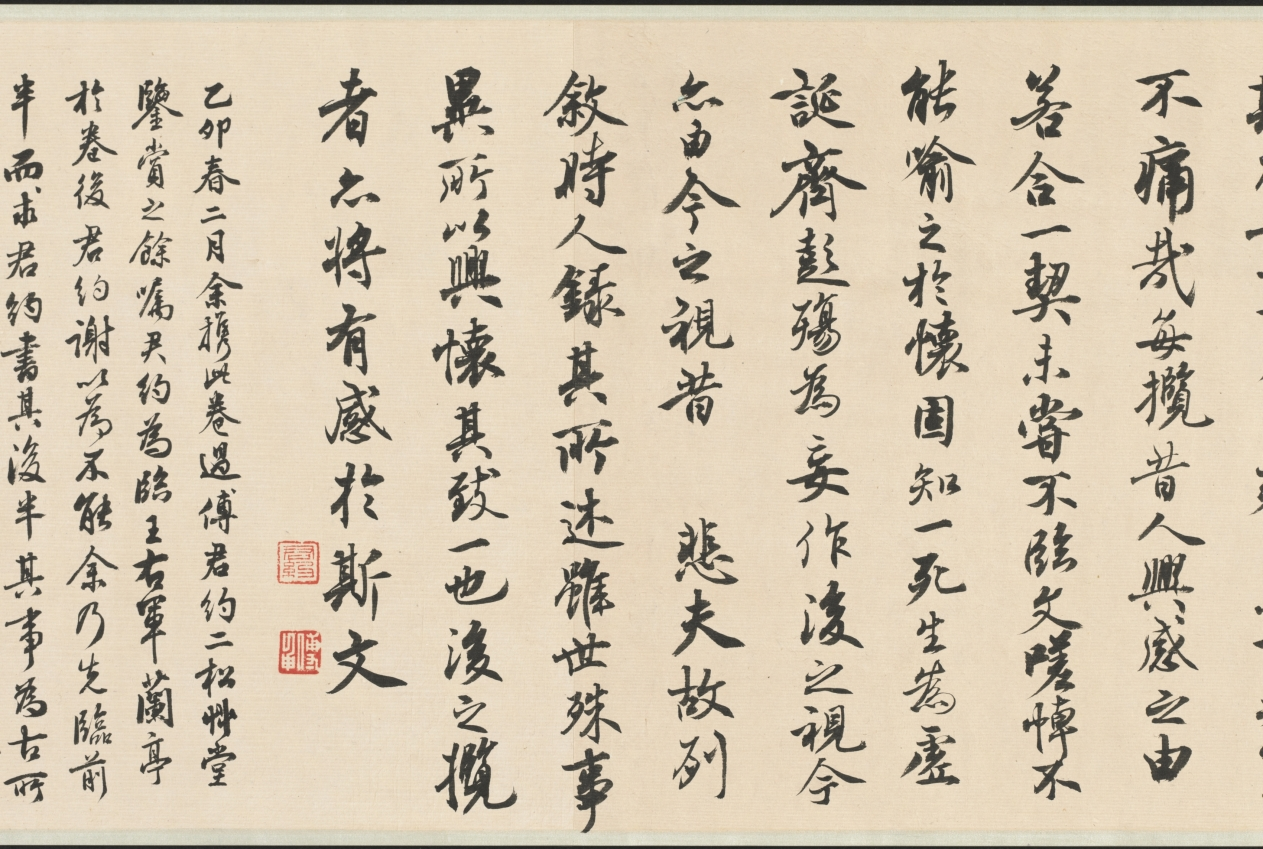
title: Purification at the Orchid Pavilion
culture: China, Qing dynasty (1644-1911)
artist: Fan Yi (Chinese, c. 1615–before 1688)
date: 1671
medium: Handscroll; ink and color on silk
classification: Painting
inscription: Artist's inscription, signature, and 2 seals: Painted by Fan Yi of Zhongfu during the second month of winter of the xinhai year [1671]. [2 seals] Fan Yi zhi yin, Zi yu yi.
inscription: Title on the frontispiece by Monk Yueshan (1629-1709).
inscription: 3 colophons and 13 additional seals: 1 colophon, dated 1707, and 6 seals of Yueshan; 2 colophons and 3 seals of Wong Kwan-Shut (Huang Junshi) 黃君實 (b. 1934); 2 seals of Fu Shen 傅 申 (b. 1937); 2 seals of Tessai Tomioka 富岡鐵齋 (1836-1924).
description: By the 1600s, the historic gathering at Lanting, Zhejiang province, in 353 CE was a common theme in Chinese painting. Originally based on a composition attributed to Li Gonglin (1049– 1106), now lost, Wu school artists revived the theme. Fan Yi, the brother of the artist Fan Qi from Nanjing, used delicate brushwork and luminous colors to depict the spring gathering.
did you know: The gathering’s host is in the Orchid Pavilion at the end of the scroll, representing an episode known as “Wang Xizhi Watching the Geese 王羲之觀鵝圖.”